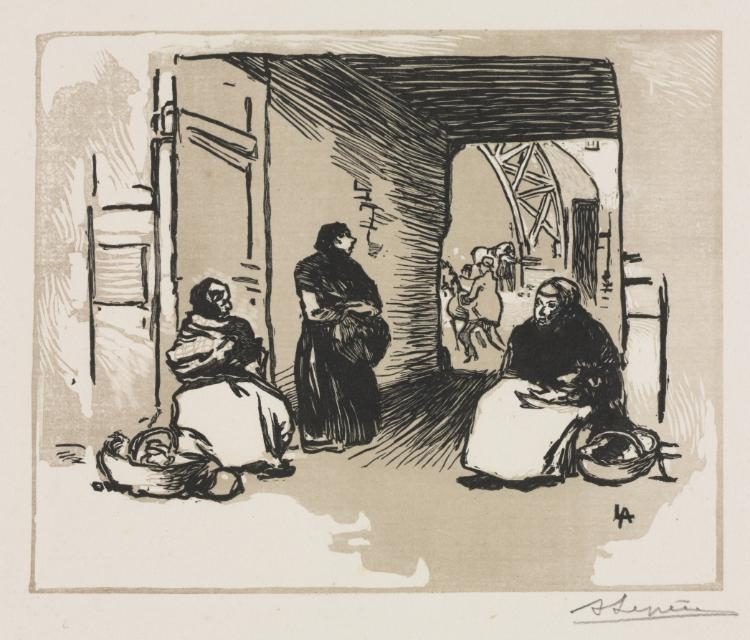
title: Bread-Sellers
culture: France, 19th century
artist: Auguste Louis Lepère (French, 1849–1918)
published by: Ed. Sagot Editeur/Paris (embossed)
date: 1889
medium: woodcut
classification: Print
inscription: lower right margin, in pencil: "A Lepere